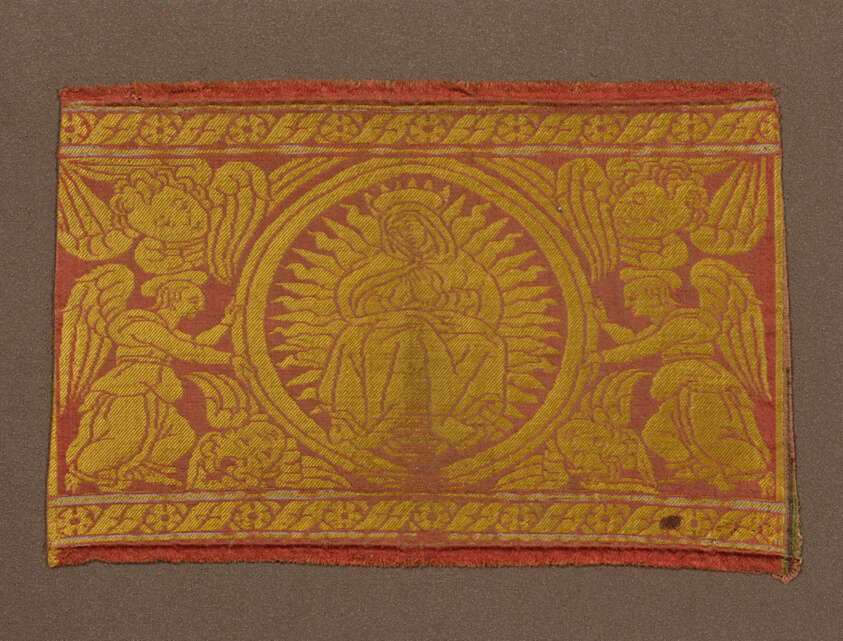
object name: Textile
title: Fragment (From an Orphrey Band)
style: Renaissance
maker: Italy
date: 15th century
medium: Silk, satin weave with twill interlacings of secondary binding warps and patterning wefts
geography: Italy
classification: textile; weaving; liturgical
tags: religious scenes